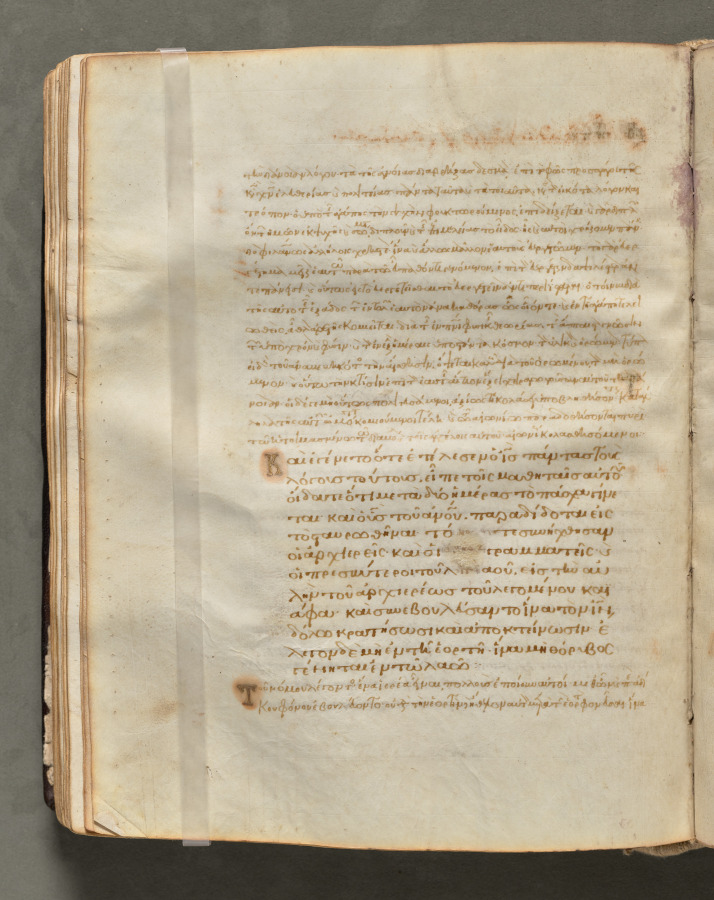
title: Text, folio 114 (verso), from a Gospel Book with Commentaries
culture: Byzantium, Constantinople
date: c. 1000–1100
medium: ink, tempera, and gold on vellum; leather binding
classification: Bound Volume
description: Each of the four gospels in this book opens on a page with brilliantly illuminated borders depicting the author of the text as well as birds-principally peacocks, symbols of the immortality of the soul-and fountains, representing the fountain of life and the salvation of the soul. This volume consists of 428 leaves with texts in Greek. Its level of sophistication suggests that it was probably written and decorated in a monastery in Constantinople.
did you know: Gospel Books were carried in procession through Byzantine churches.